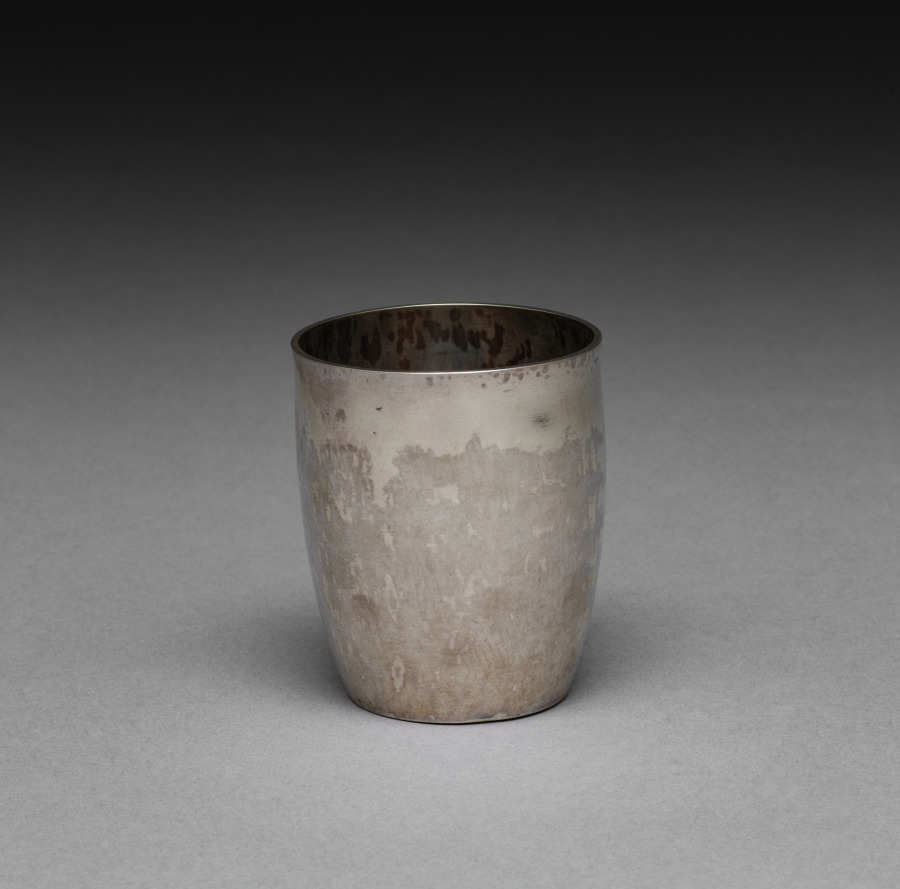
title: Beaker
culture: America, Massachusetts, Boston, 19th century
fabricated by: Thomas Knox Emery (American, 1781–1815)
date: 1805–1815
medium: silver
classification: Silver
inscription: engraved "CSR" in bright-cut script on body.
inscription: Stamped underside: "T.K.E."